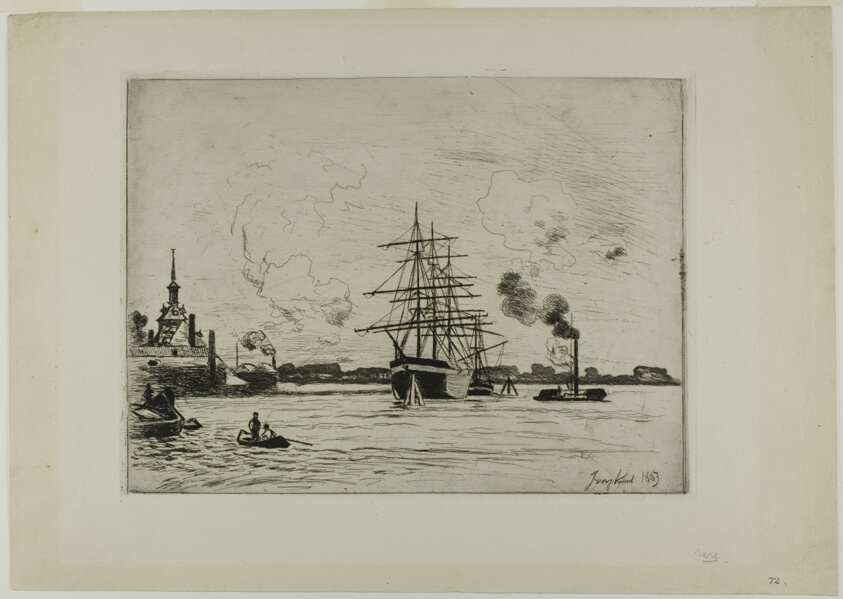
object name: Print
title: The Old Port of Rotterdam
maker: Johan Barthold Jongkind (Dutch, 1819-1891)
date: 1863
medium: Etching on cream laid paper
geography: Holland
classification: etching; print; prints and drawing